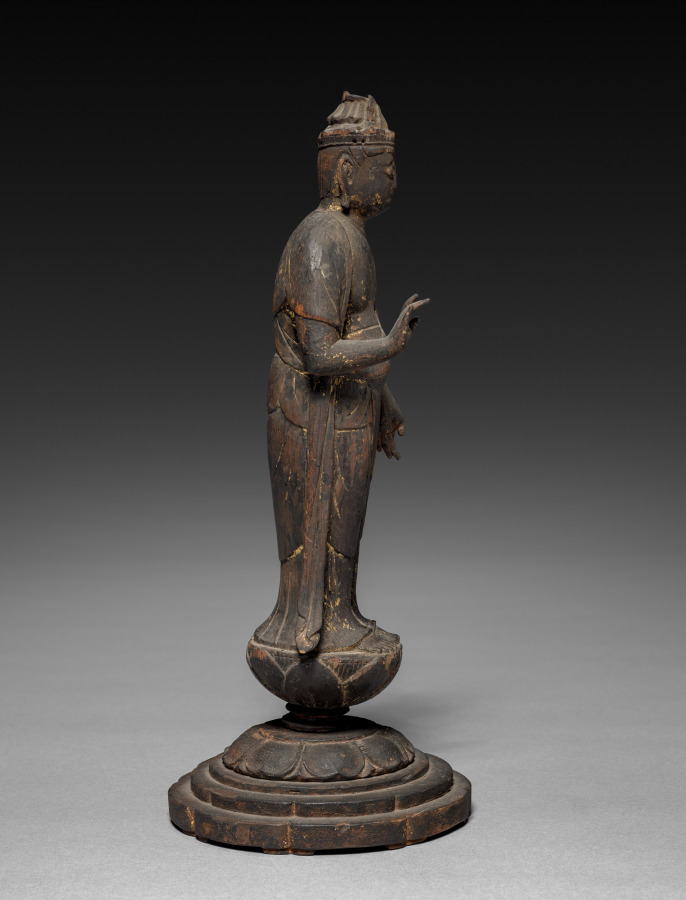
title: Kannon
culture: Japan, Heian period (794–1185) or Edo period (1615–1868)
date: 1000s or c. 1800–1868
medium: Wood with traces of lacquer and gilding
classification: Sculpture